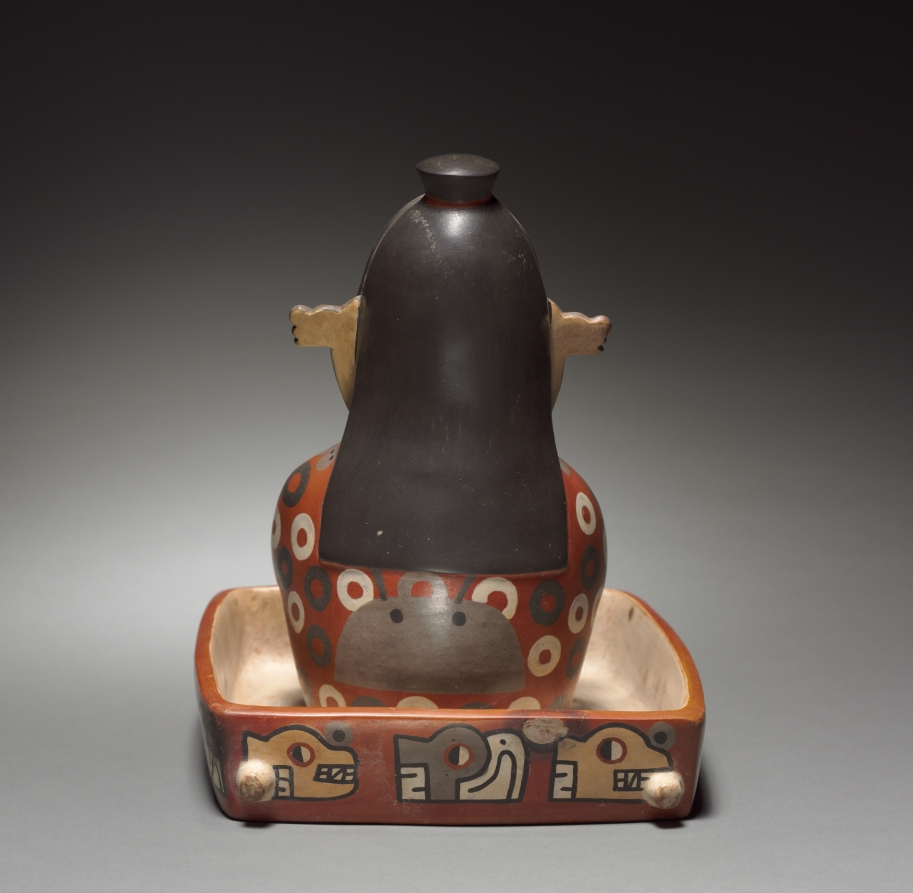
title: Figure in a Litter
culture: Wari (Pachacamac) style, Middle Horizon, Epoch 2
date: 500–900 (Thermoluminescence date, 590–1090)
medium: earthenware with colored slips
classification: Ceramic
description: Whether a deity, ancestral mummy, or masked human, this figure signals power. The divided eyes and fangs are traits of supernatural beings. The hands are cupped around holes that once perhaps held staffs, symbols of human and divine authority. And the litter was a mode of travel reserved for those of high station; the knobs refer to poles that rested on the shoulders of human bearers.